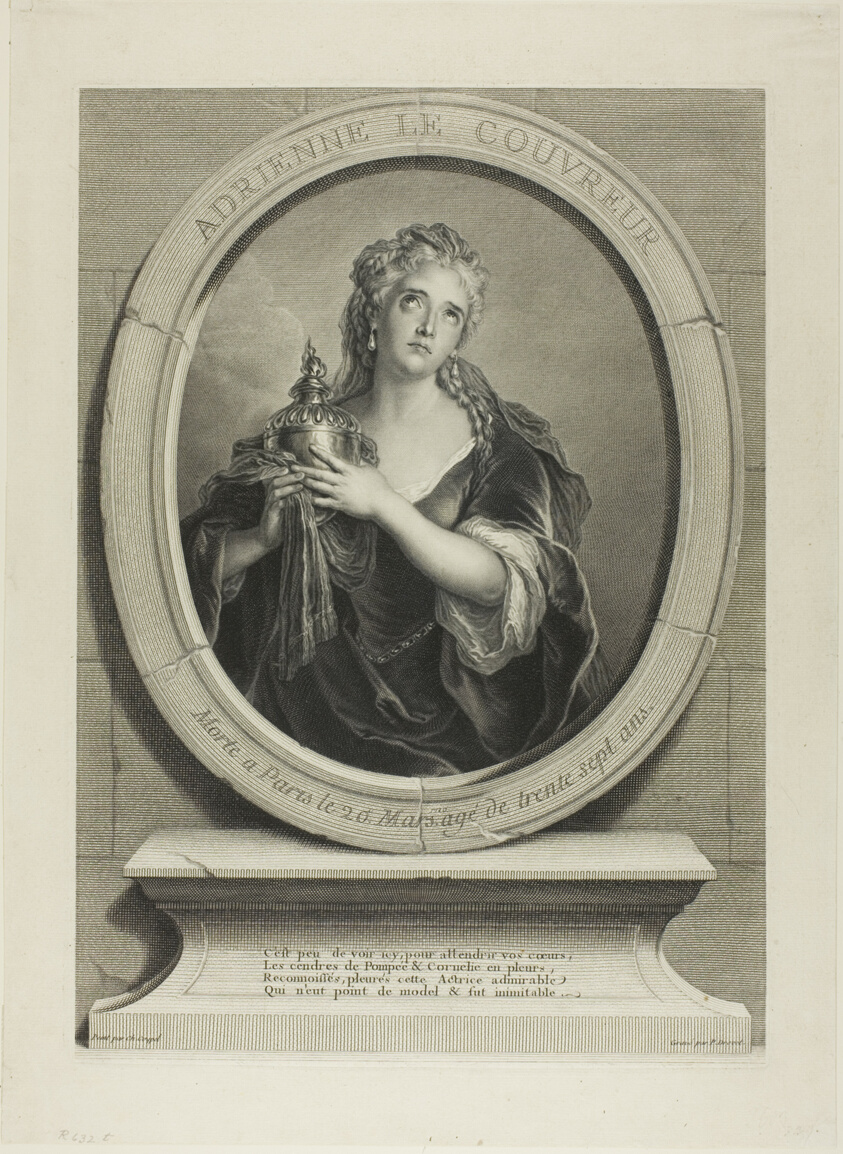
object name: Print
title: Portrait of Adrienne Le Couvreur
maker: Pierre-Imbert Drevet (French, 1697-1739); after Charles-Antoine Coypel (French, 1694-1752)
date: 1730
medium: Engraving on ivory laid paper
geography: France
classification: engraving; print; prints and drawing